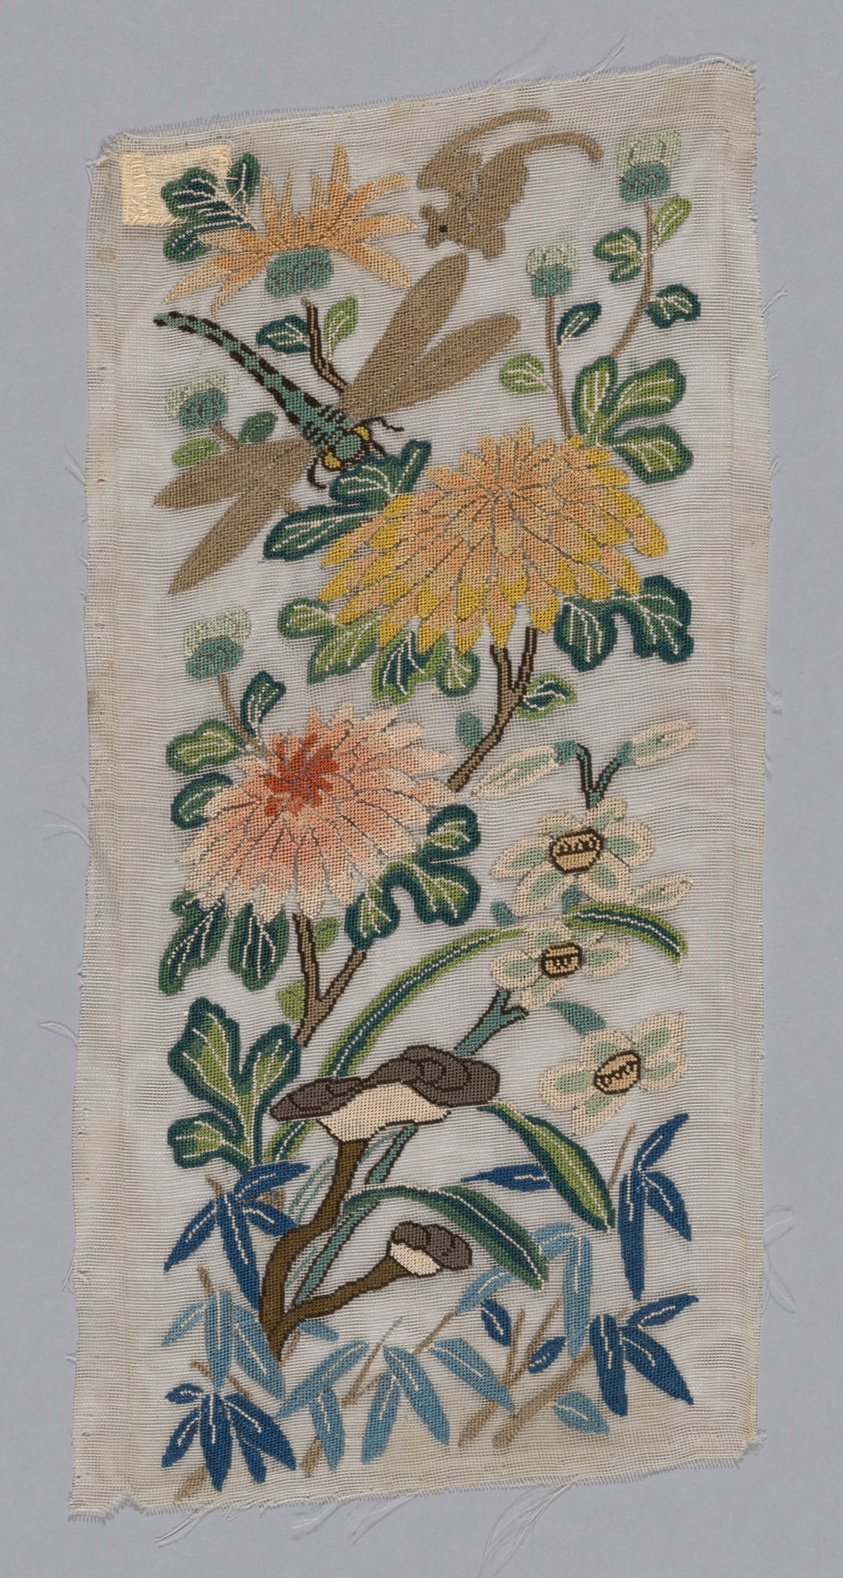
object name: Textile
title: Trimming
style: qing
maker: Han-Chinese (China)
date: Qing dynasty(1644–1911), 1850/1900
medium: White gauze, embroidered strips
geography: China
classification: weaving; textile